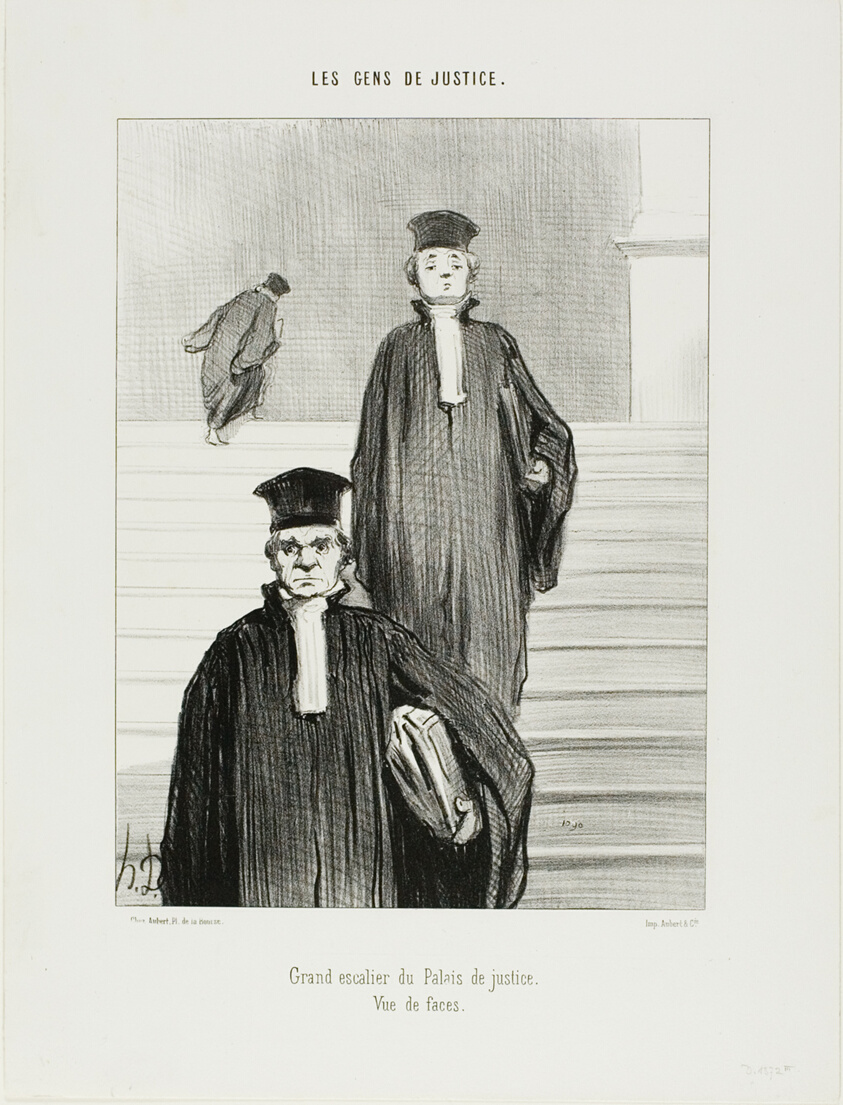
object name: Print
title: Main Staircase of the Palace of Justice. Front view, plate 36 from Les Gens De Justice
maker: Honoré Victorin Daumier; French, 1808-1879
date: 1848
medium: Lithograph in black on white wove paper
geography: France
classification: lithograph; print; prints and drawing